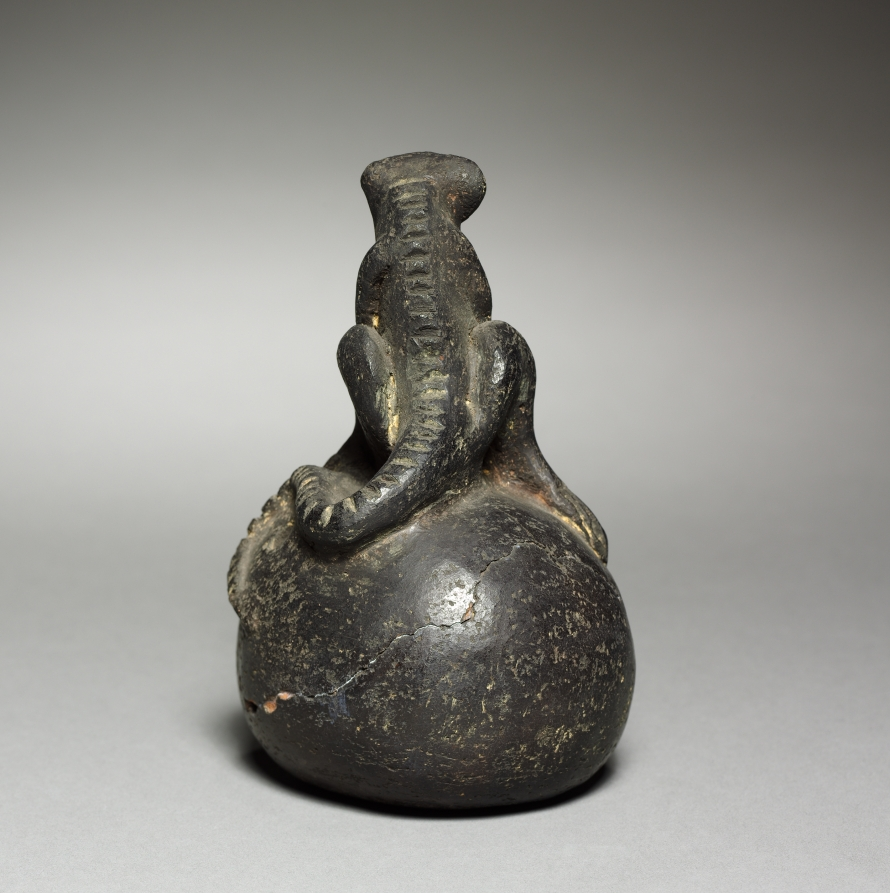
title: Figurine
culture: Colombia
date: before 1921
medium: pottery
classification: Ceramic